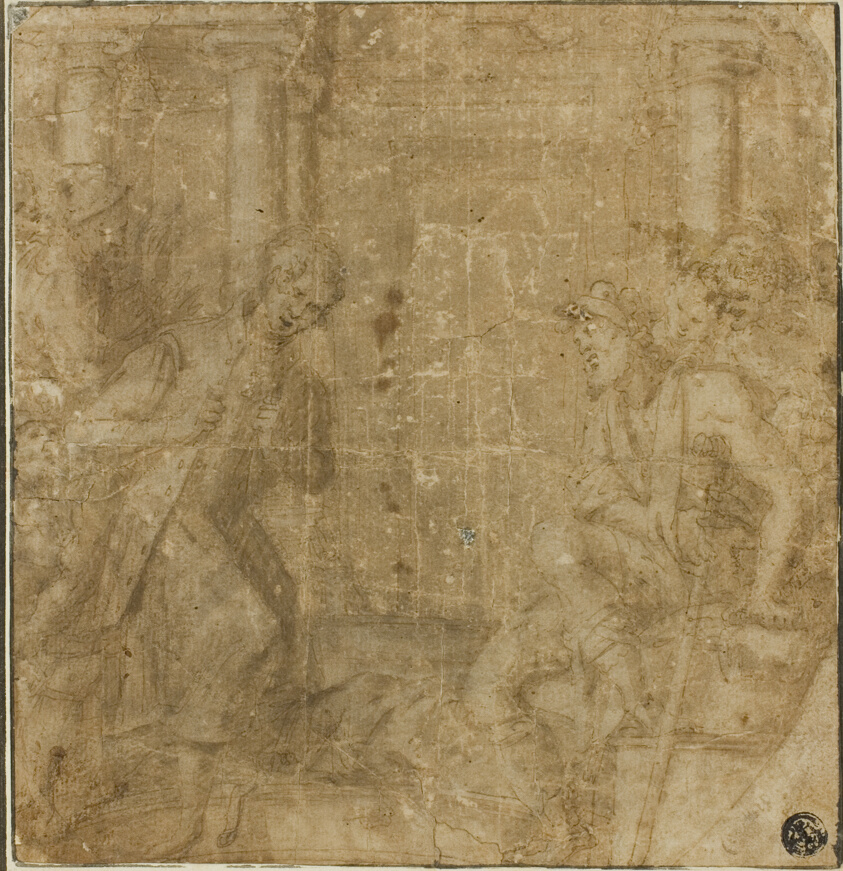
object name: Drawing and Watercolor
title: Study for Saint Francis of Assisi Giving His Cloak to an Impoverished Knight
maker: Giovanni Battista della Rovere, called Il Fiamminghino; Italian, 1561-1627/30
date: 1591/95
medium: Pen and brown ink with brush and brown wash, over traces of graphite, on tan laid paper, laid down on ivory laid paper with pink and orange watercolor border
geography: Italy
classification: ink or chalk wash; drawings (visual works); prints and drawing